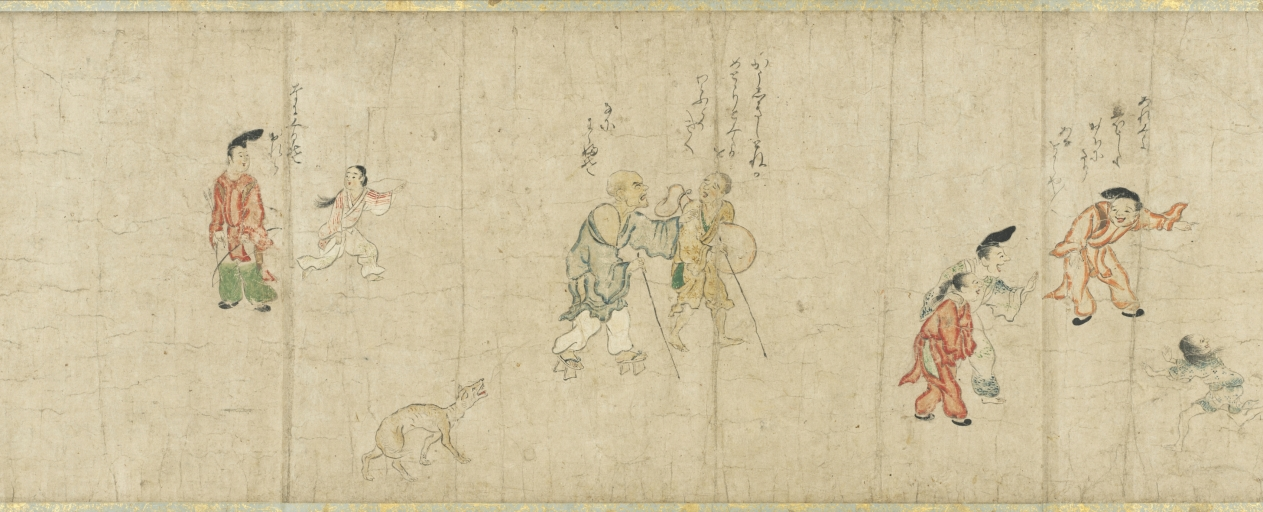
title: The Story of Fukutomi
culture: Japan, Muromachi period (1392–1573)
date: mid-1400s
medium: Handscroll; ink and color on paper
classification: Painting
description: This handscroll shows the second half of an odd tale in which a ne’er-do-well seeks the path to quick fortune and learns the art of musical flatulence. Prior to a major performance, a mentor (and competitor) advises him to consume morning glory seeds, a laxative. Thus, while performing he fouls himself and ends his days in humiliation. The audacious nature of this story and its presentation—well-animated figures with dialogue adjacent to the appropriate moments of action—create a primitive graphic novel. Japanese visual humor about farting preceded this story, but the satirical, mean-spirited twist in this tale suggests its intent was not merely to be humorous. The story was likely commissioned by court officials who disapproved of common performers rising to high positions, outflanking what was the accepted social order.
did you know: This scroll is treasured as the second oldest surviving version of this story.